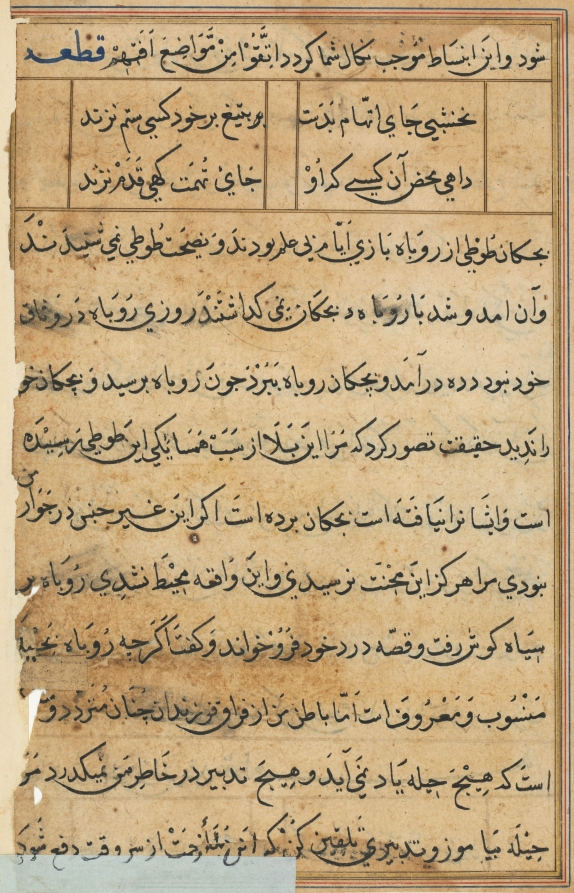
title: Page from Tales of a Parrot (Tuti-nama): text page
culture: Mughal India, court of Akbar (reigned 1556–1605)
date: c. 1560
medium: gum tempera, ink, and gold on paper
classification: Painting